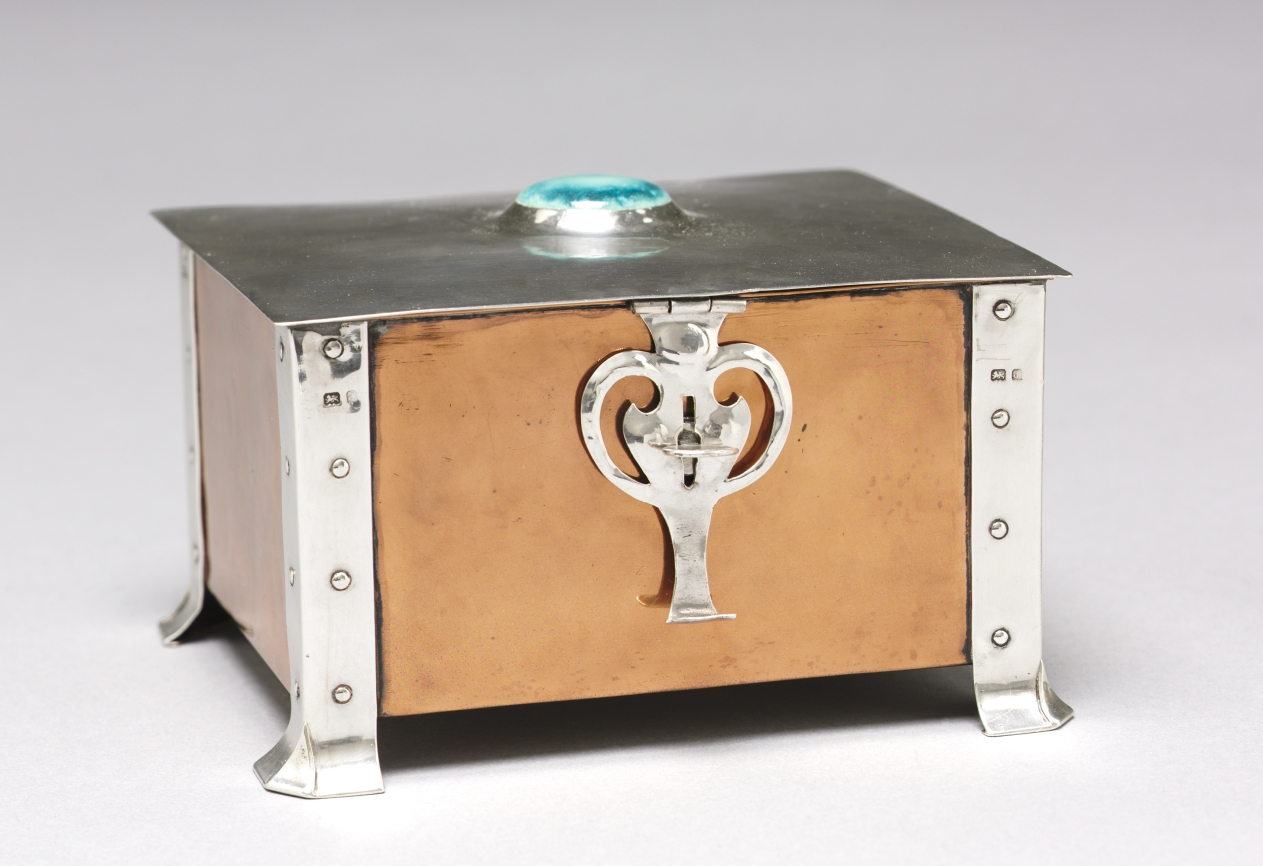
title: Covered Box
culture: England, Birmingham, early 20th Century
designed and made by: A. Edward Jones (British, 1878–1954)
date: 1903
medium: silver, copper, ceramic with wood lining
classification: Metalwork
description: British designer Albert Edward Jones founded A. Edward Jones in 1902, an Arts and Crafts metalworking firm that primarily produced ecclesiastical and domestic objects at the time of this box's creation. The box combines silver and copper metalwork, sleekly designed with limited embellishment.